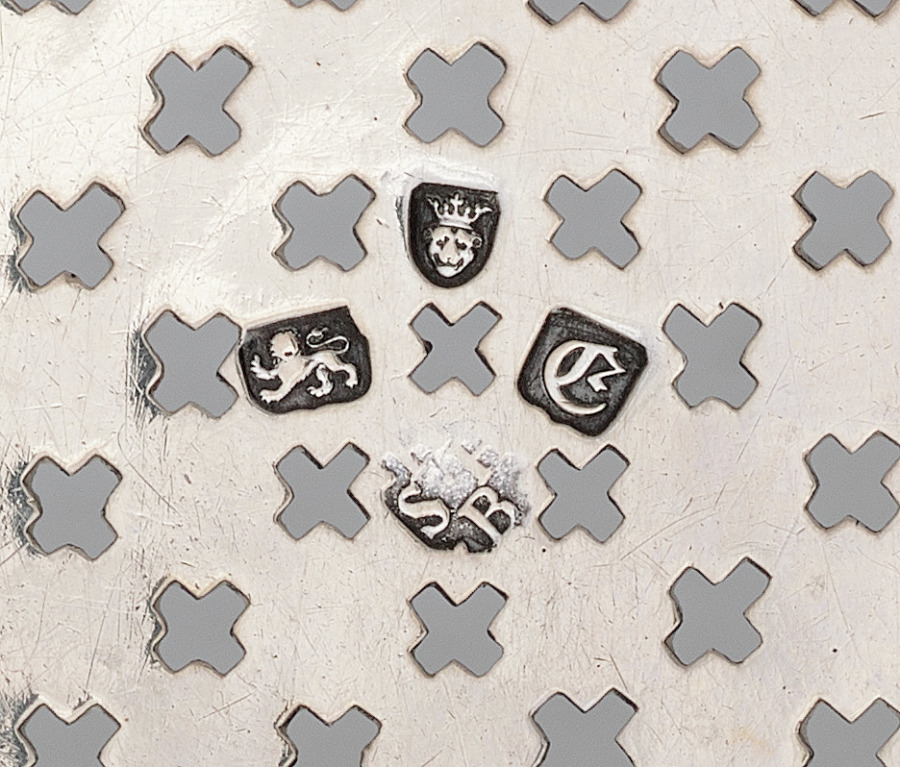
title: Strainer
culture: England, London, 18th century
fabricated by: Samuel Herbert (British)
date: 1760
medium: silver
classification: Silver